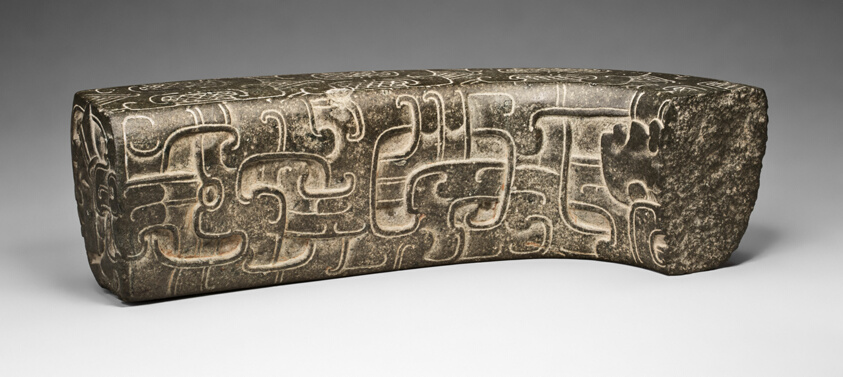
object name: Sculpture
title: Fragment of a Ceremonial Ballgame Yoke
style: totonac, tajin, classic veracruz, mesoamerican, Pre-Columbian, americas, Arts of the Americas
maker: Totonac; El Tajín and vicinity, northern Veracruz, Mexico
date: 700–800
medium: Stone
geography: El Tajín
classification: ceremonial object; stone; sculpture; art of the americas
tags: sports, scrolls (motifs), ceremony, ritual, games, abstract figures, faces, supernatural